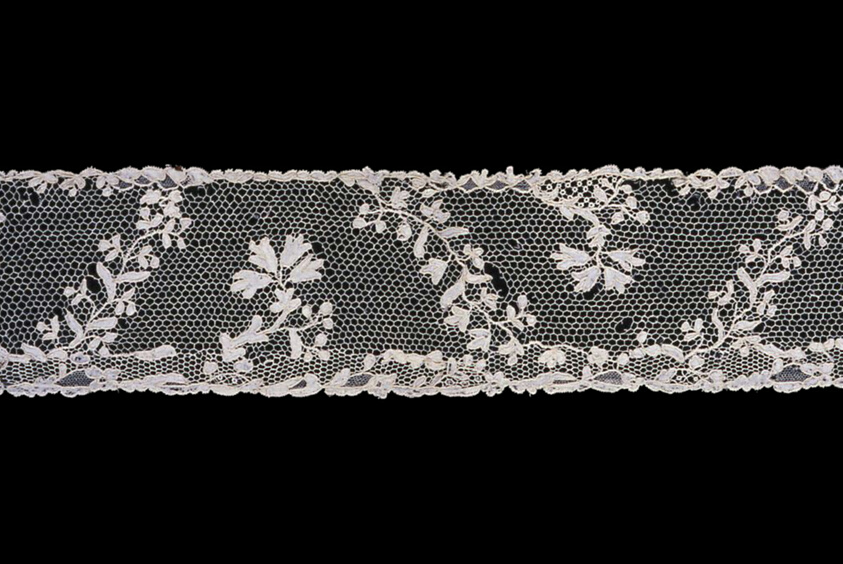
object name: Textile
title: Two Fragments (Border)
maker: France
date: 1765/75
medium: Linen, needle lace of a type known as "Point d'Argentan" with buttonholed mesh ground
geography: France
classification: textile; lace - needle; lace